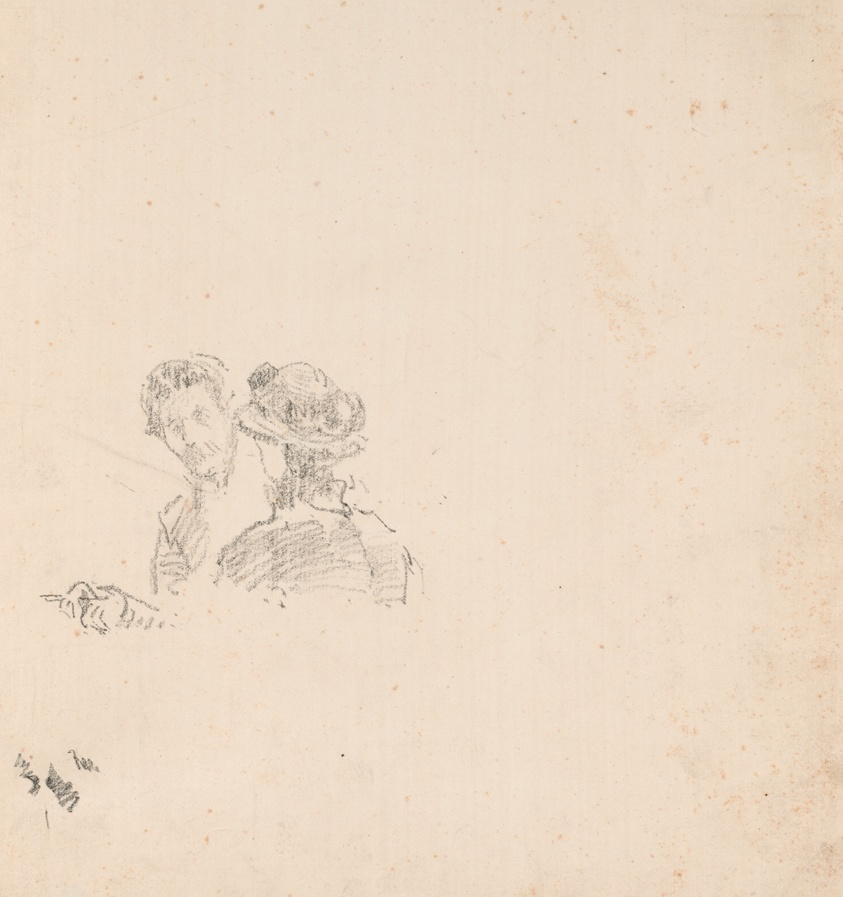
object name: Print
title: Sketch: Self-Portrait with Miss R. Birnie Philip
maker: James McNeill Whistler (American, 1834-1903)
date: 1895, printed posthumously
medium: Transfer lithograph in black on cream wove proofing paper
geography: United States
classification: transfer lithograph; lithograph; print; prints and drawing; paper